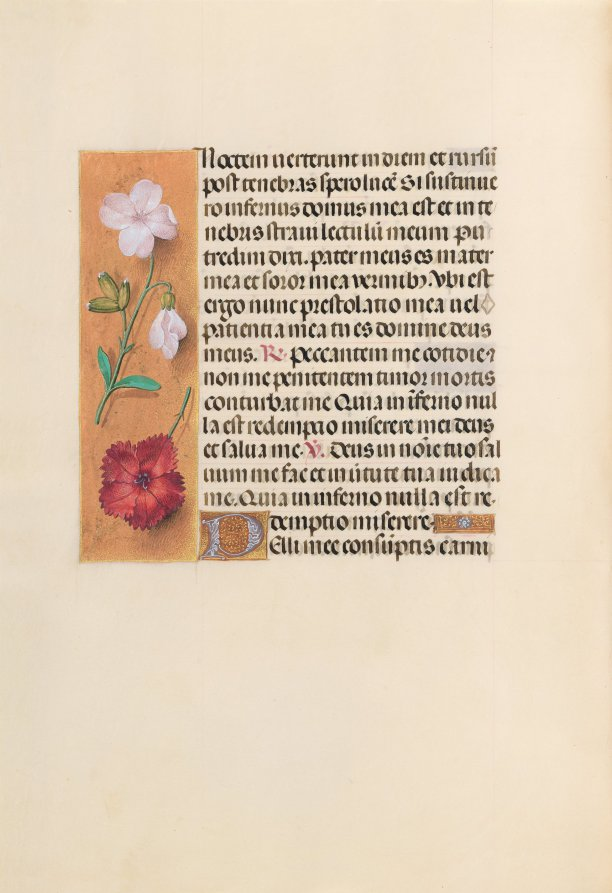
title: Hours of Queen Isabella the Catholic, Queen of Spain: Fol. 244v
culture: Flanders, Ghent and Bruges, late 15th century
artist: Master of the First Prayerbook of Maximillian (Flemish, c. 1444–1519)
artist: and Associates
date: c. 1500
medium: ink, tempera, and gold on vellum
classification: Bound Volume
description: This manuscript was illuminated by a circle of at least five highly organized manuscript painters active in the Flemish cities of Ghent and Bruges. The principal illuminator was Alexander Bening, who painted the majority of the book's miniatures. Manuscripts produced by this circle of artists are renowned for the decoration of their borders, which typically feature a rich variety of realistically-painted flowers, birds, and butterflies. This prayer book, called a book of hours, was intended not for a cleric, but for the private devotions of a lay person-in this case, Isabella the Catholic, Queen of Spain (1451-1504). Isabella's coat of arms embellishes the book's frontispiece. It is unlikely that the book was commissioned by the Queen herself; rather, she probably received it as a diplomatic gift from someone courting her patronage, perhaps Cardinal Francisco Jimenez de Cisneros. A Franciscan friar, Jimenez was dependent upon Isabella for his advancement, first to the post of Queen's confessor in 1492, and then to Archbishop of Toledo in 1495.